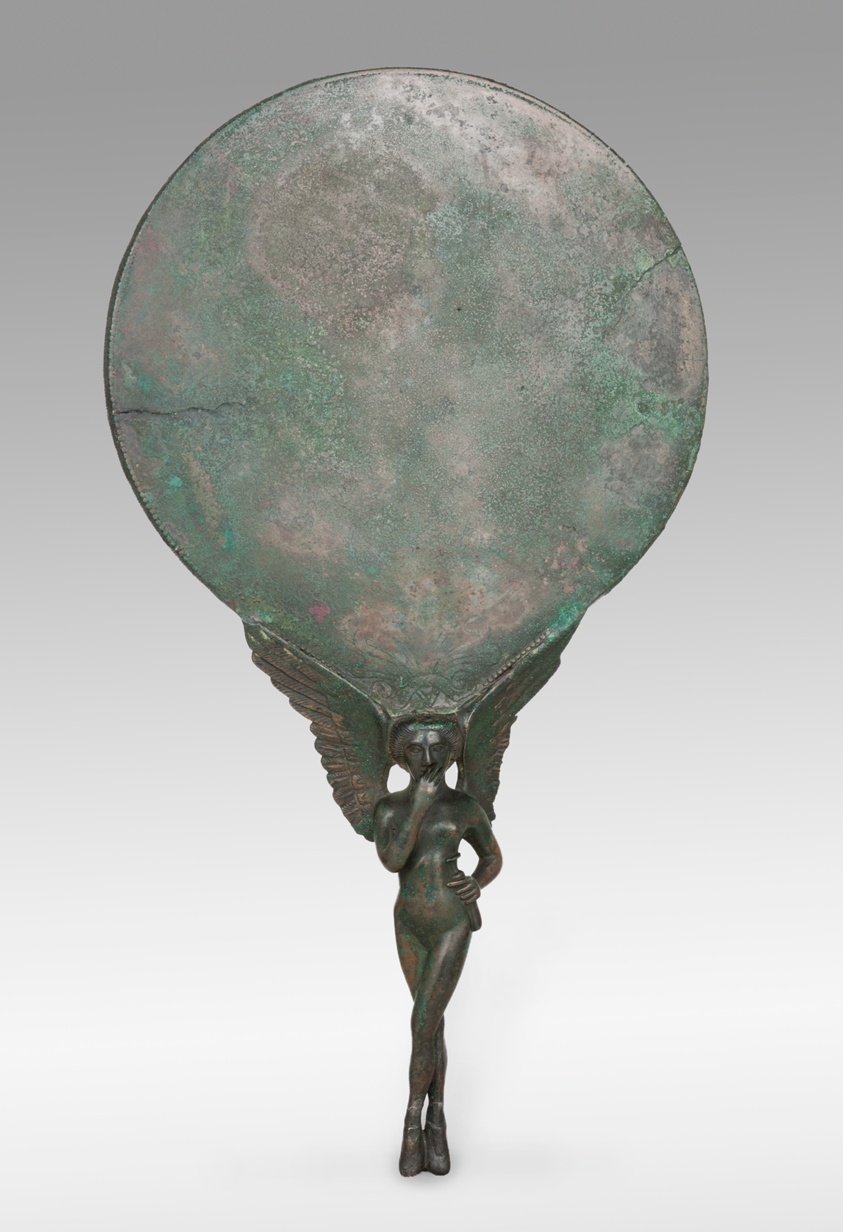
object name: Decorative Arts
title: Mirror with a Handle in the Form of a Female Figure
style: etruscan, ancient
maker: Etruscan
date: 3rd century BCE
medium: Bronze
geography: Etruria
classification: decorative arts; mirror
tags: female, figure